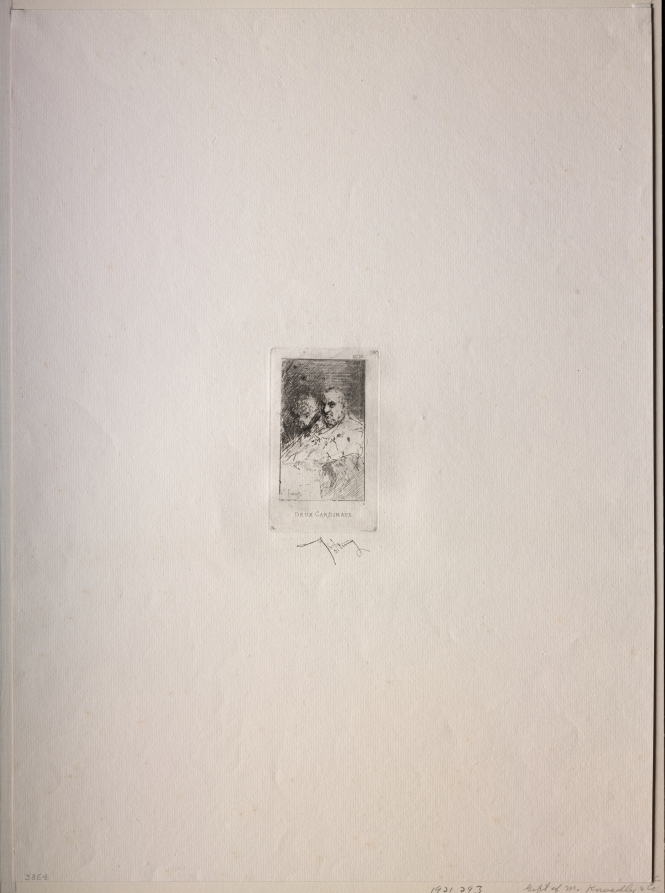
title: Two Cardinals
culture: Spain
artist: Mariano Fortuny (Spanish, 1838–1874)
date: c. 1860–70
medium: etching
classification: Print